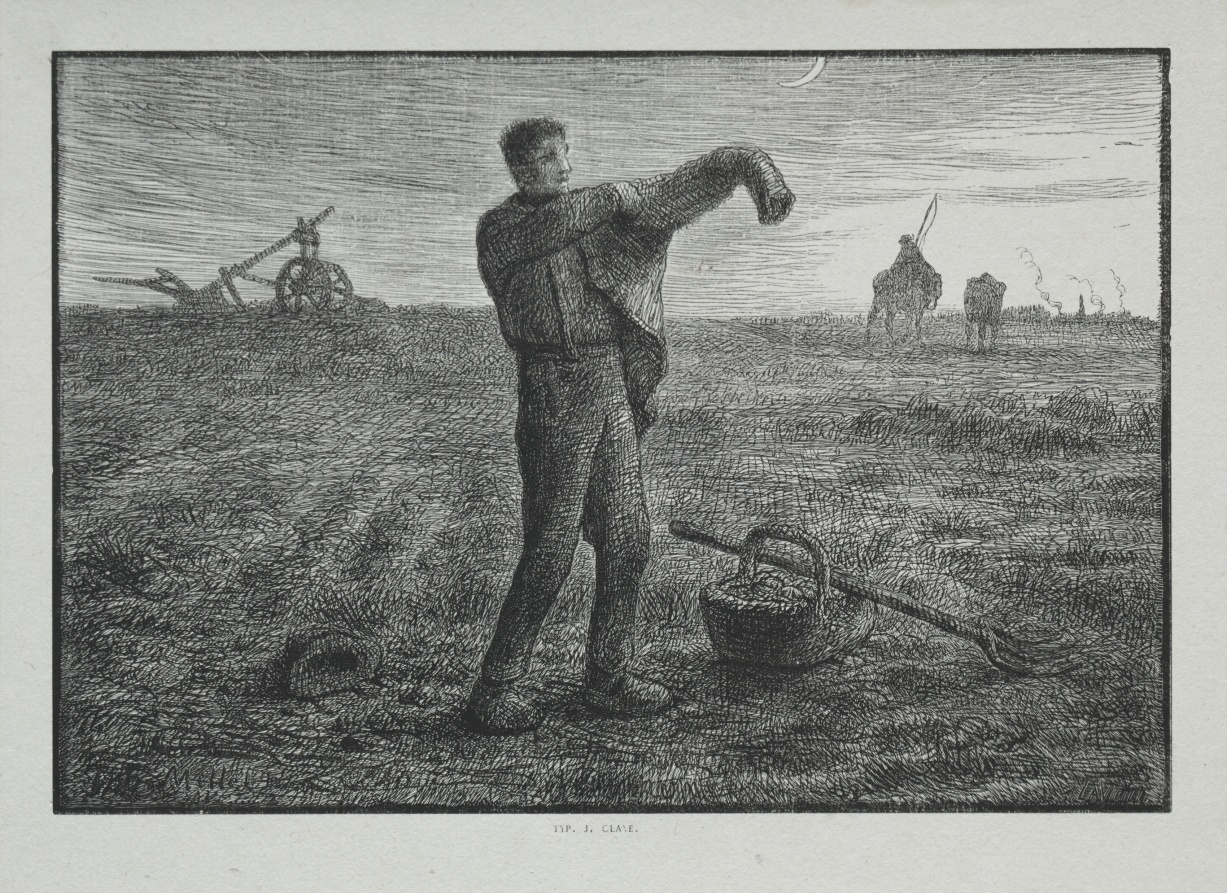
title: Four Hours of the Day: Evening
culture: France, 19th century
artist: Adrien Lavieille (French, 1818–1862)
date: 1860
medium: wood engraving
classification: Print